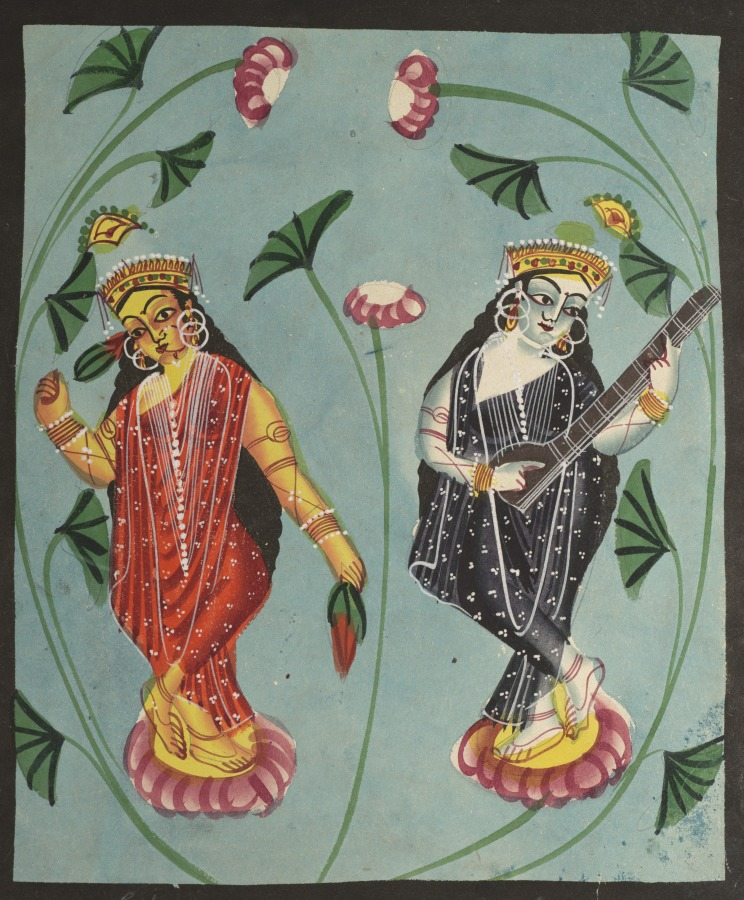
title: Lakshmi and Sarasvati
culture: Eastern India, Bengal, Kolkata, Kalighat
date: c. 1890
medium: Gum tempera, graphite, and ink on paper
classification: Painting